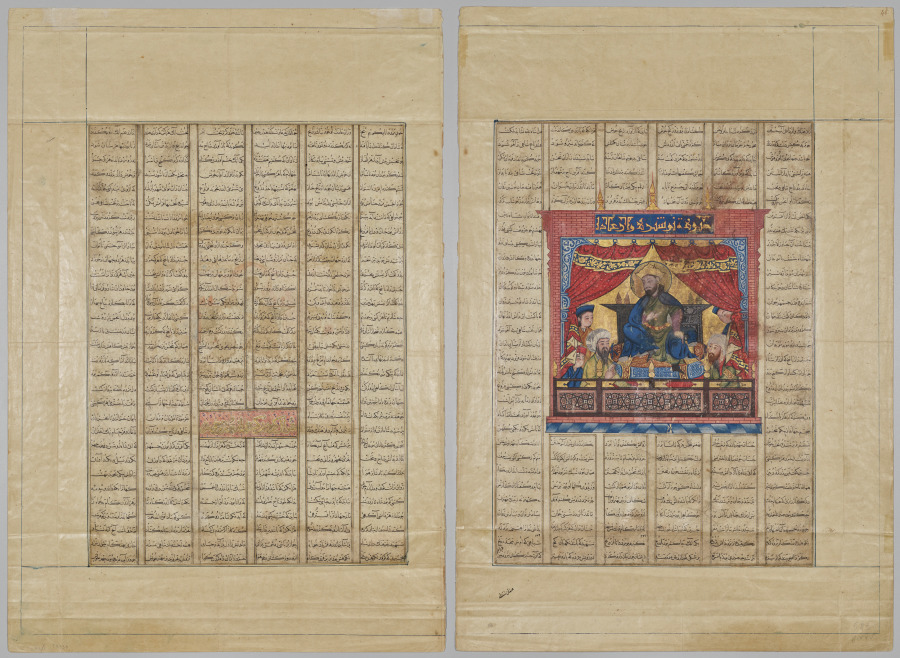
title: Persian Verses: The Fortieth Year of King Kisra Nushirwan's Reign and the Story of Buzurgmihr (recto); Portrait of Nushirwan the Just (verso) from a Shahnama (Book of Kings) of Firdausi (940–1019 or 1025)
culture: Iran, Tabriz, Ilkhanid period (1256-1353)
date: 1330–35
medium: opaque watercolor, ink, and gold on paper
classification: Manuscript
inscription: Script: Naskh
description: Mongol interest in the production of illustrated manuscripts eventually focused on Persian epic poetry. The Shahnama, a compilation of the epics and tales of Iran's legendary heroes, was a natural choice; the book included many subjects that suited Mongol taste, such as banquets, battles, hunting, and magical or fantastic events. Seated on the throne in the center of the painting is the Sasanian ruler of Iran, Khusraw I Anushirwan (531–579), descendant of Bahram Gur. Above the king's head an inscription reads, "Picture of Nushirwan the Just." The figure in the elaborate turban to the left of the king is probably the young Minister Buzurgmihr, famous for his wisdom and virtue. To celebrate the explanation of a troublesome dream by Buzurgmihr, Nushirwan held a series of seven banquets. The text around this painting describes the fifth banquet.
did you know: The Shahnama, a great epic poem in 50,000 verses, traces the history of Iran from legendary times through the Sasanian period.